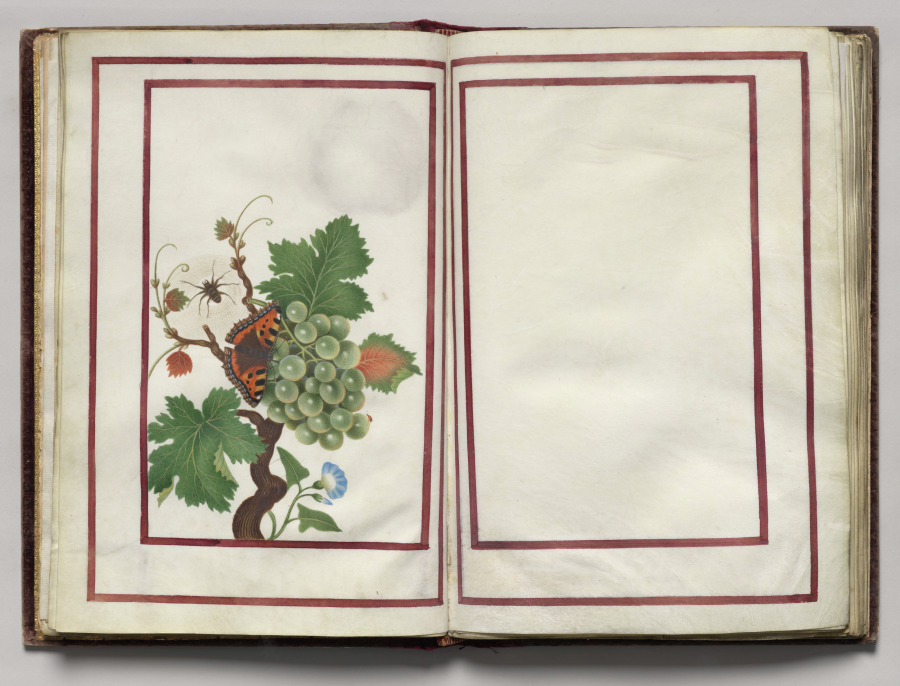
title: Morning Glory, Cluster of Grapes, and Spider, folio 10 (verso), from Florilegium (A Book of Flower Studies)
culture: France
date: 1608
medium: watercolor, ink, silver, and gold over occasional traces of pencil, on vellum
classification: Bound Volume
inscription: Dated: Poitiers 1608 (on frontispiece) Signed: On frontispiece in black ink, lower right: Van Kuyk Notation on drawing: Frontispiece: in pencil, lower margin: * élève de Van Kessel, peintre flammand (* in pencil also appears in front of Van Kuyk's name).